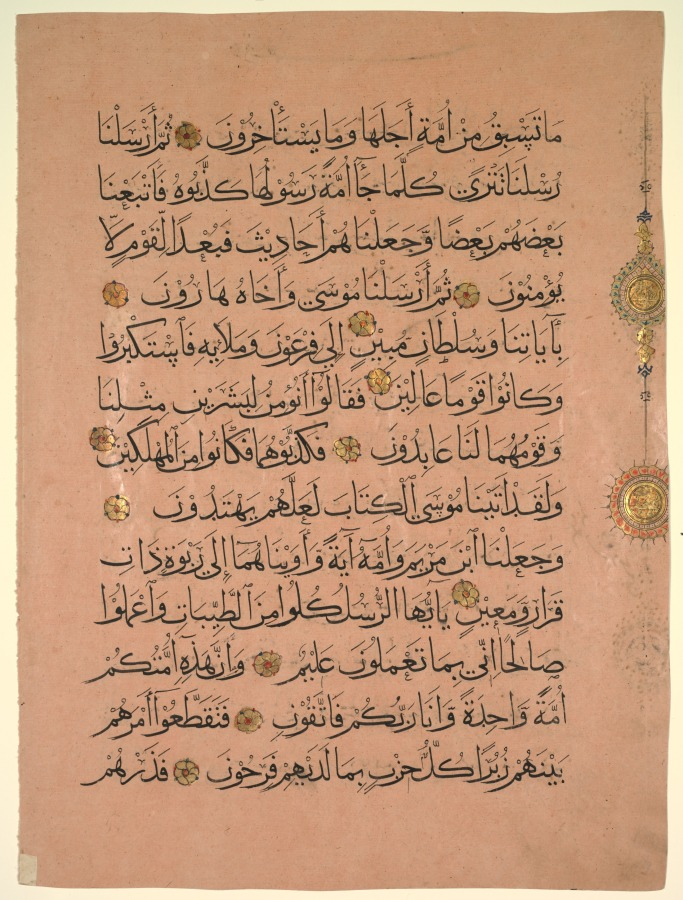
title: Leaf from a Qur'an (verso)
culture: Egypt, Cairo, Mamluk Sultanate (1250–1517)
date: 1300s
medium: ink, gold, color on pink paper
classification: Manuscript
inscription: 13 lines of muhaqqa script; waqf inscription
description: It is through the Arabic language that the Qur’an was revealed to the Prophet Muhammad in the 600s. As a result, calligraphy is celebrated as the highest form in Islamic art. This page shows 13 lines from the Qur’an in muhaqqa script, one of the six main script types of Arabic calligraphy. The Qur’an’s importance explains the significance of calligraphy; however, the latter was not restricted to just religious texts. Many objects in the Islamic art gallery bear calligraphic inscriptions and come from secular contexts, displaying the versatility and creativity of this art form.